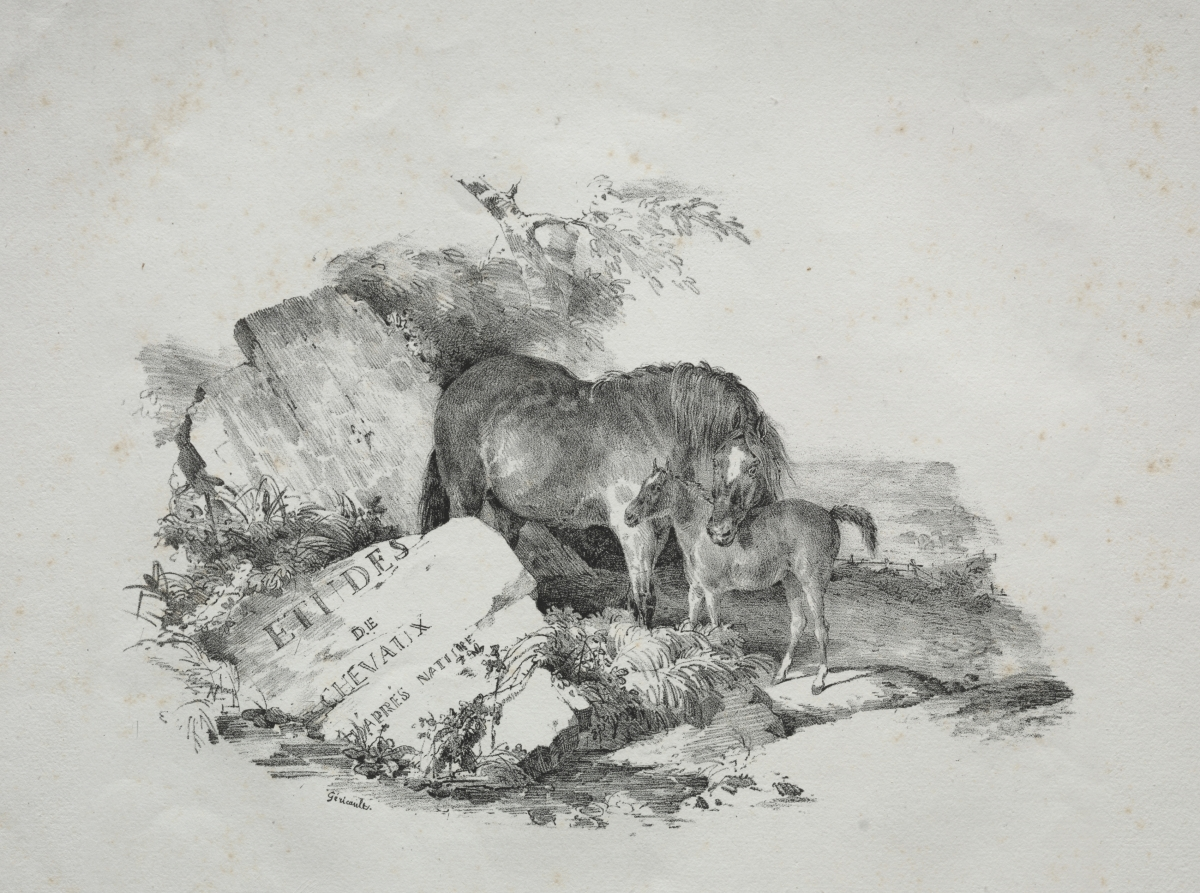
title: The Mare and Her Foal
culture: France, 19th century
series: Lithographic Studies of Horses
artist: Théodore Géricault (French, 1791–1824)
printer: Godefroy Engelmann (French, 1788–1839)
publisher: Gihaut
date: 1822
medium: lithograph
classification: Print